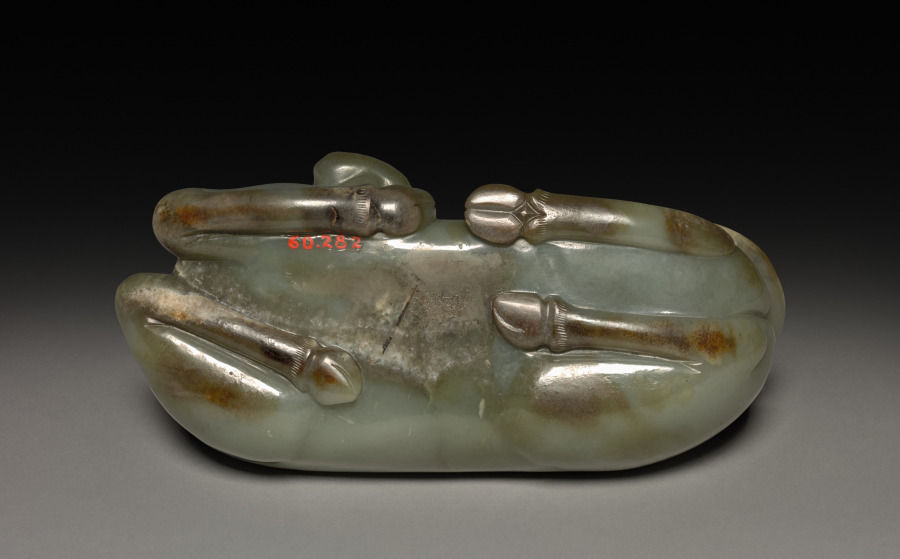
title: Reclining Water Buffalo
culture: China, Qing dynasty (1644-1911)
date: 1644–1911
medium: jade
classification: Jade